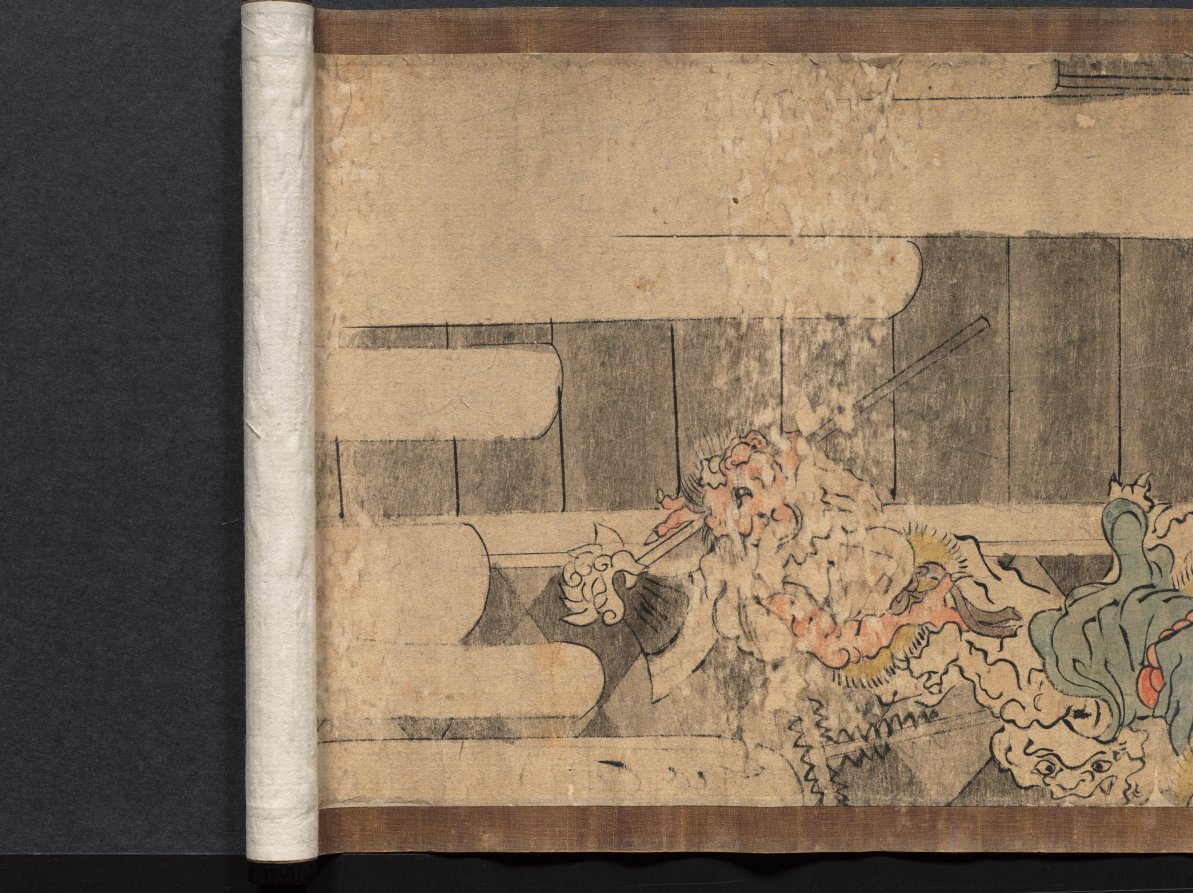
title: Oeyama Engi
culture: Japan, Edo period (1615–1868)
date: 1615–1868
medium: one of a pair of handscrolls; ink and color on paper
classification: Painting